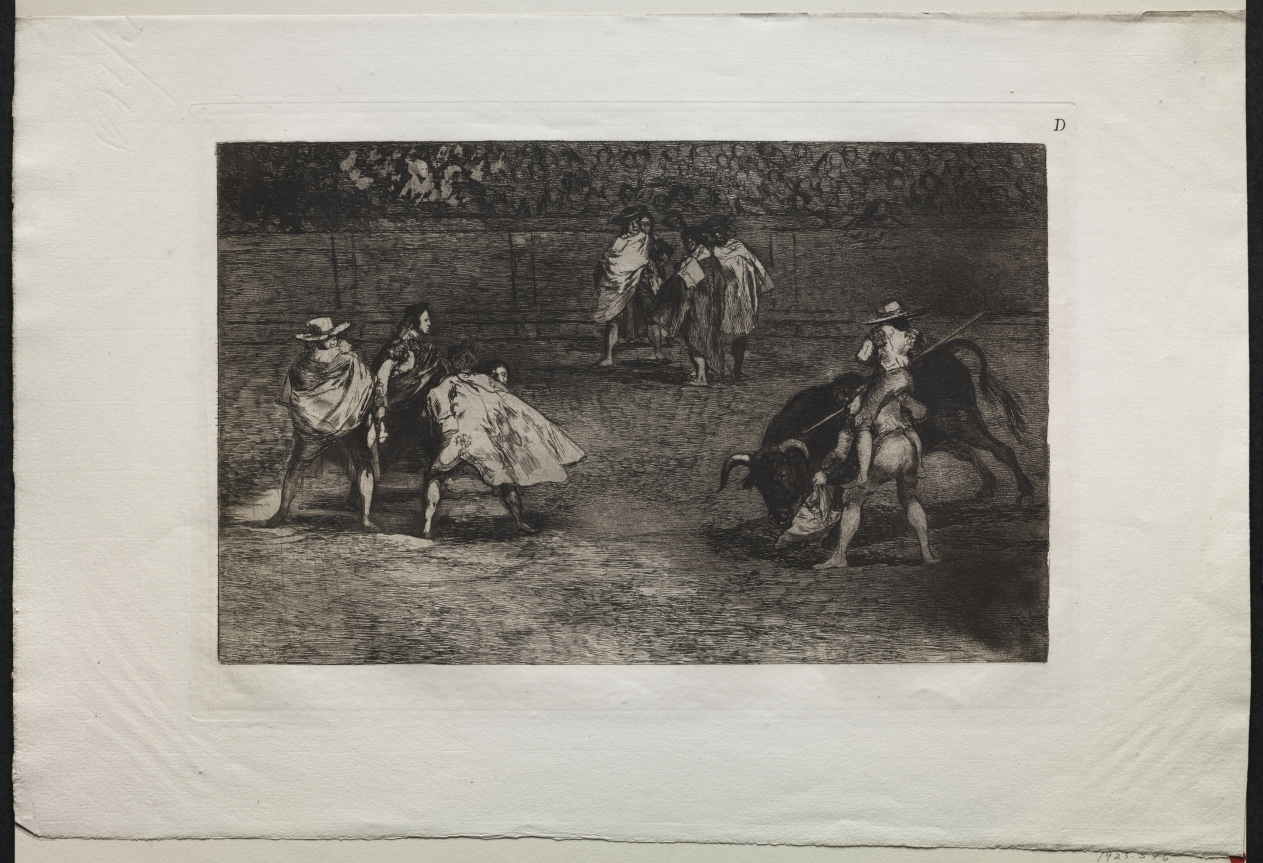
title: Bullfights: A Bullfighter Mounted on the Shoulders of an Assistant, Spearing a Bull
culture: Spain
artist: Francisco de Goya (Spanish, 1746–1828)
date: 1816, printed 1876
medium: engraving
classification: Print